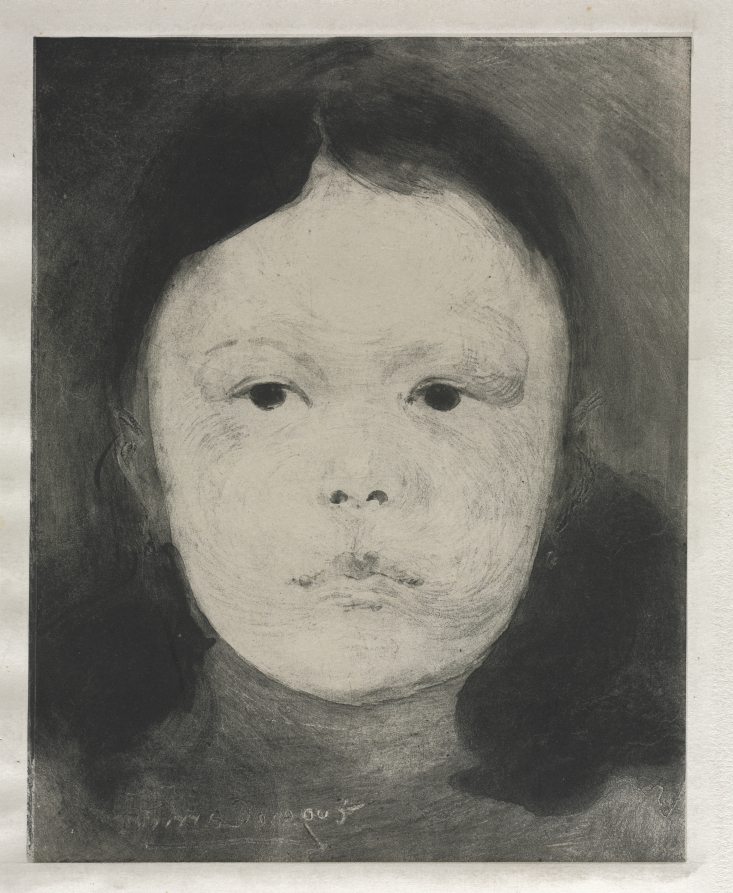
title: Marguerite Carrière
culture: France, 19th century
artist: Eugène Carrière (French, 1849–1906)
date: 1890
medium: lithograph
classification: Print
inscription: signed, lower left, in stone: Eugène Carrière